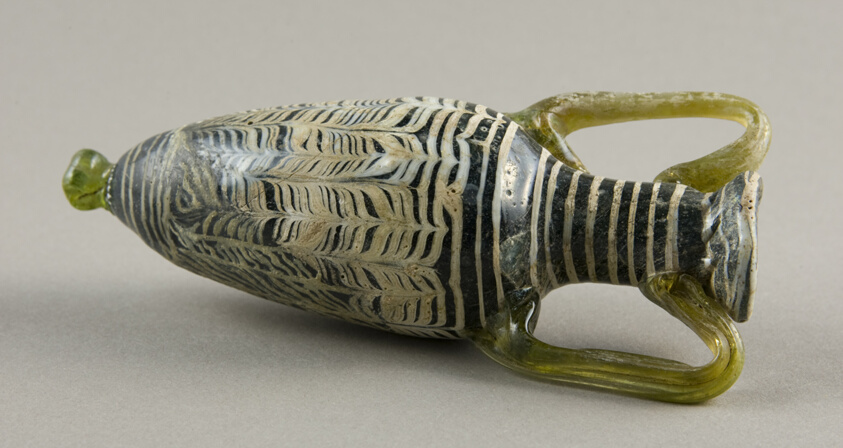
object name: Vessel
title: Amphoriskos (Container for Oil)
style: hellenistic, ancient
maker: Hellenistic; Ancient Mediterranean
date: 2nd-1st century BCE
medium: Glass, core-formed technique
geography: Mediterranean Region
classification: glass; vessel; ancient art